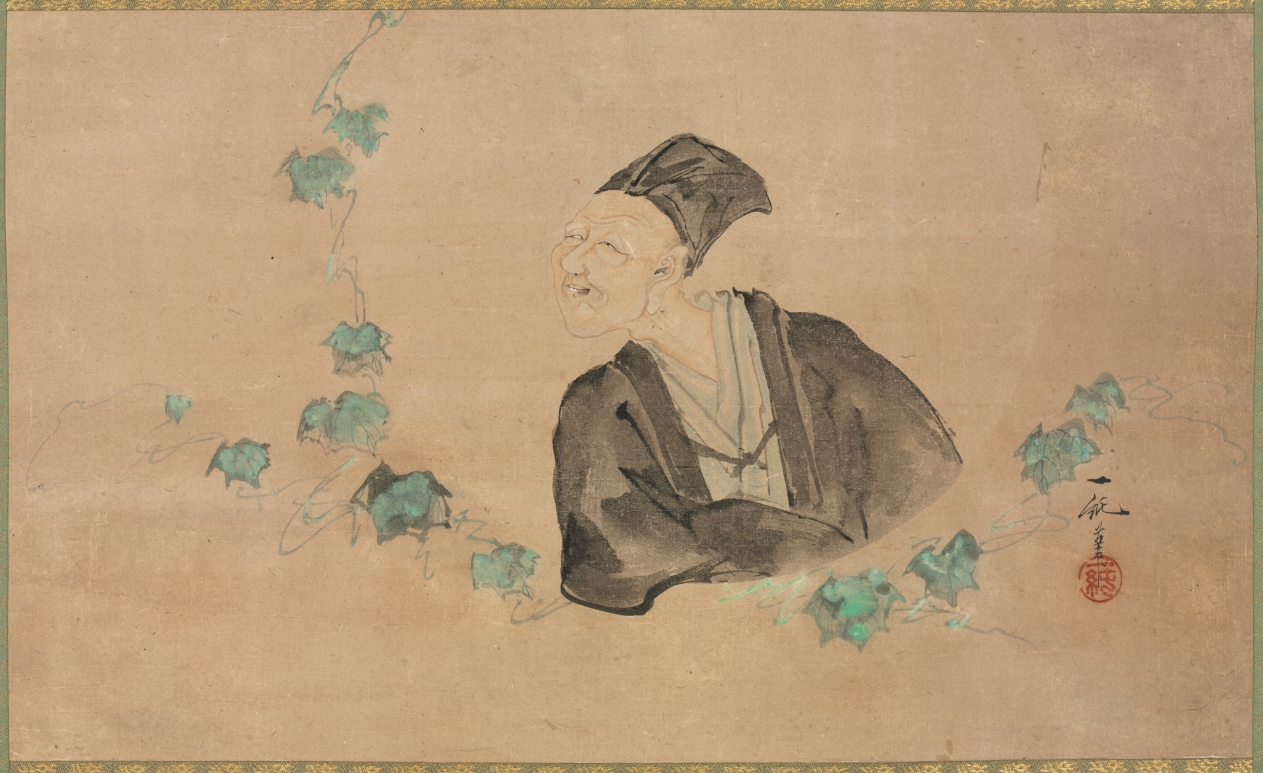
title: Portrait of Basho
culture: Japan, Edo period (1615–1868)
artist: Ichijun (Japanese, active 1700s)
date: 1700s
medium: hanging scroll; ink and color on paper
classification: Painting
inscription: 一純筆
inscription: 一純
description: The 15th-century poet Matsuo Basho is still considered Japan’s greatest master of the haiku poem, a short, 17-syllable verse form that relates some aspect of nature to the human experience. Although he was one of the most celebrated men of his day, he pursued a simple life of self-imposed poverty and solitude. In this portrait, Ichijun alluded to Matsuo’s haiku about the transient life: warau beshi naku beshi, waga asagao no, shibomu toki (to smile or to cry when my face in the morning [glory] is wilted).